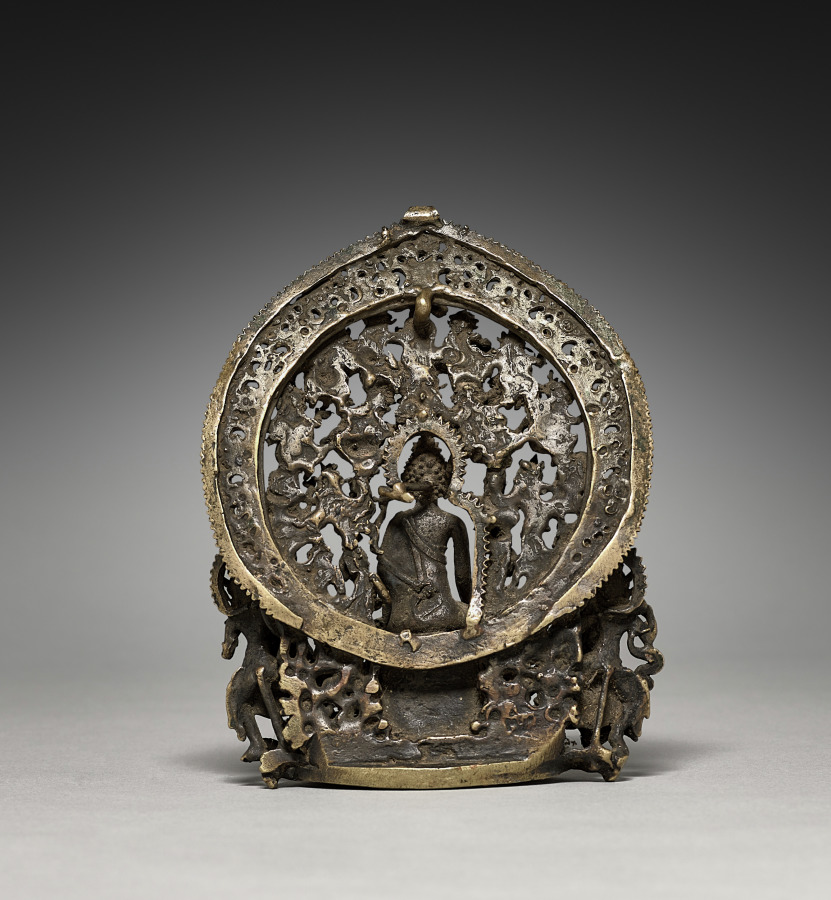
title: Triumph of the Buddha, Marvijaya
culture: Nepal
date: 1400s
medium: bronze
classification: Sculpture